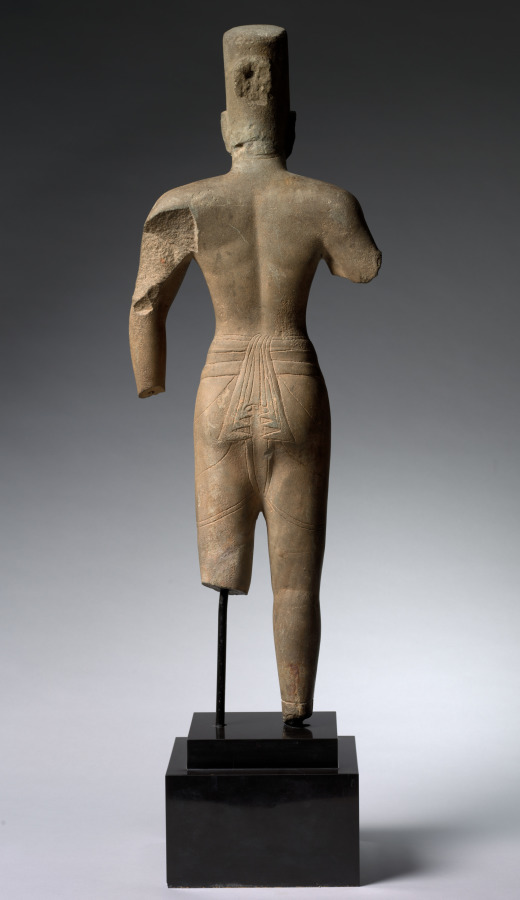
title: Vishnu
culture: Cambodia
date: 650–99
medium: gray sandstone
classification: Sculpture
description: The muscular physique, sensitive smile, and flat-topped high crown are characteristics of Vishnu images made during the pre-Angkorian period (c. 550–802) in Cambodia. This sculpture probably was the sole object of worship in a small brick temple sanctum.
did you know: The god wears a short garment (sampot) tied to form a loop on the left with the hanging ends on the right thigh.